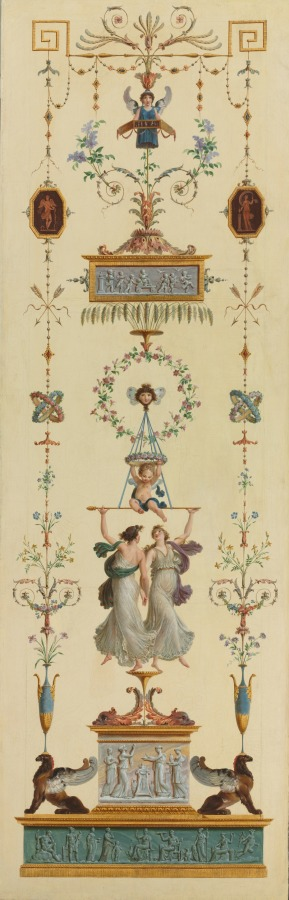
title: Decorative Panel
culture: France, 18th century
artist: Pierre Rousseau (French, 1751–1829)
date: 1790s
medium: oil on canvas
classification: Painting